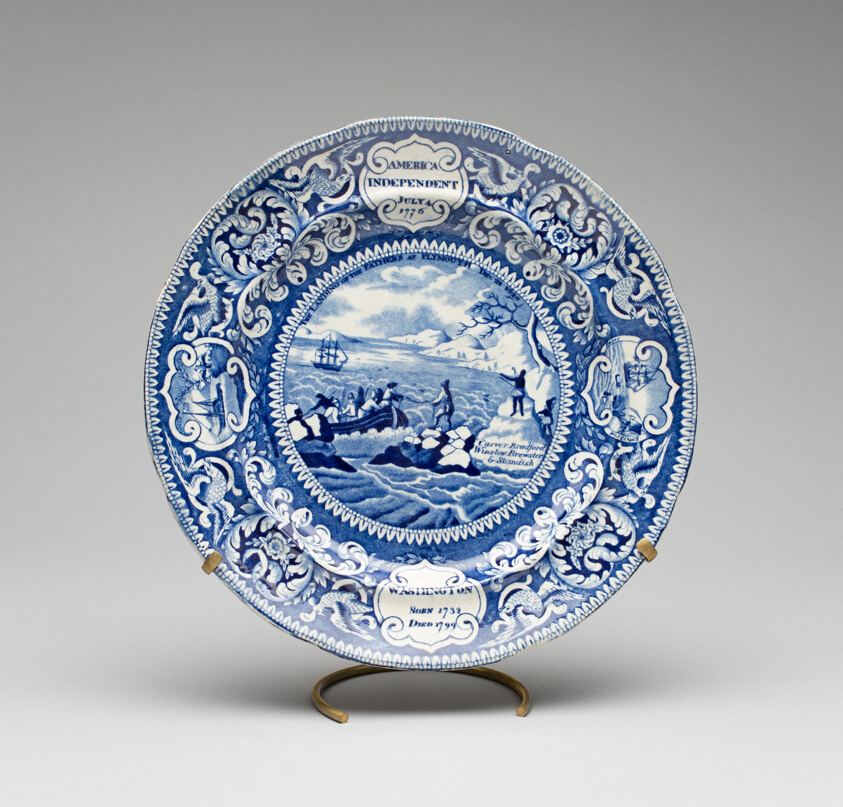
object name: Decorative Arts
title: Plate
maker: Enoch Wood & Sons; English, active 1818–1846; Made for the American market; Staffordshire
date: 1825–30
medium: Earthenware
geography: Staffordshire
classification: plate (general, dish); earthenware; dish (vessel); american decorative arts; ceramics; decorative arts